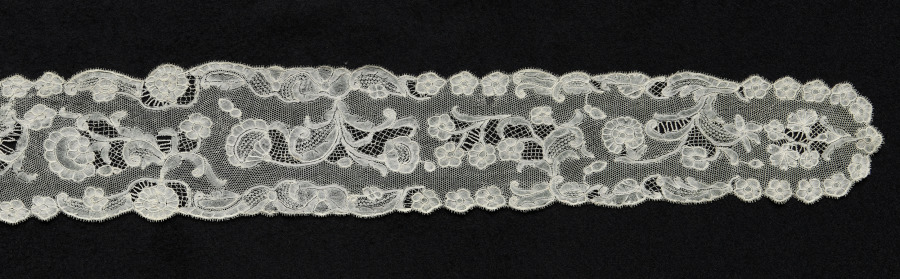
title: Lace Edging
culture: Belgium, Brussels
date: 1700s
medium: Linen: bobbin lace (Point d'Angleterre)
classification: Lace